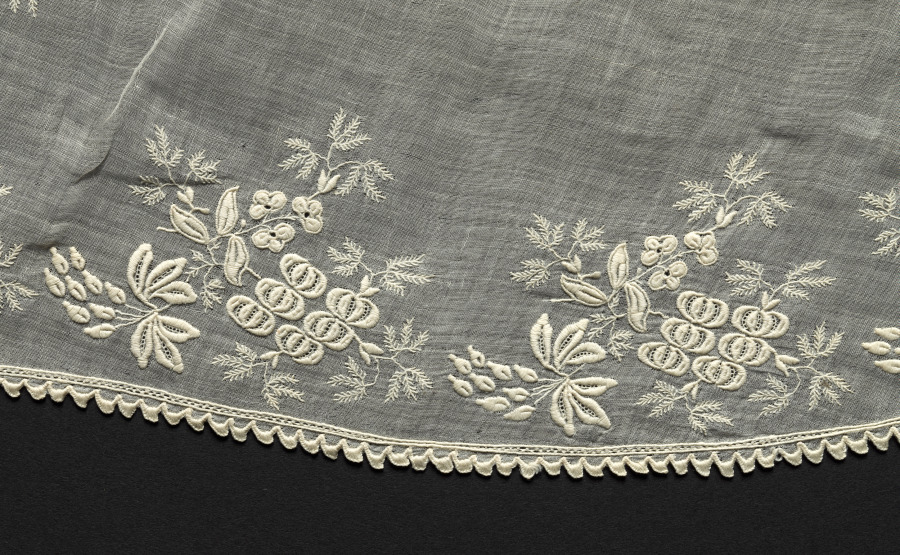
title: Collar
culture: America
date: c. 1836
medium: Linen: embroidered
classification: Embroidery